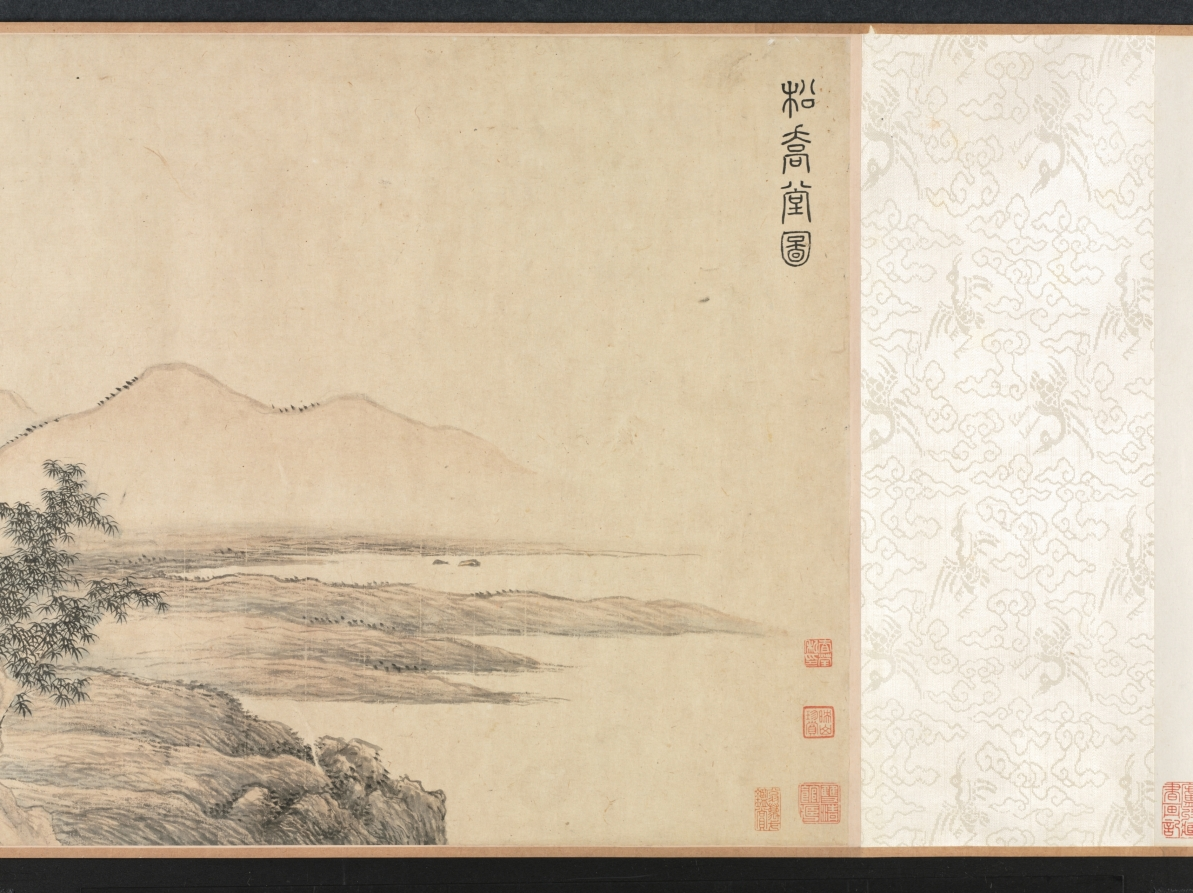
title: Hall of Lofty Pines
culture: China, Qing dynasty (1644-1911)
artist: Wang Hui (Chinese, 1632–1717)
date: 1703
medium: handscroll; ink and color on paper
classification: Painting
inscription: [題] 松喬堂圖 康熙癸未夏六月, 海虞耕煙散人王翬畫。[印]王翬之印; 石谷. [左下] 來青閣; 耕煙野老時年七十有二.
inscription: 松喬堂圖一卷，海虞石谷王君為靜海近公厲少司冦公作也。圖成于癸未之夏。未幾而公遂仙去。公令子今編修君南湖屬余題跋其後。余與公同官侍從，交契最深。側見公之清修純德，蔚為聖天子所眷重。侍直內廷，密勿贊襄，幾二十餘年。蒼生之所以受賜，士林之所以沐德者，天下莫能窺，在廷莫能悉。而公卒不言。以故宸衷日益契，恩禮亦日益渥。雖年逾懸車，時有歸老之念。而上固不聼公之去。其所謂松喬堂者，御書以賜公者也。蓋以松比公之清風勁節，而歲寒不改，經霜彌茂。則又以期公之壽考未有艾焉。公知此身未易乞，而山林槃磵之樂，止可寄諸寤思。此松喬堂圖之所由作也歟。石谷此圖，結構精密，筆墨超邁。其寫樹木之蒼蔚，堂宇之靚幽。恍見摩詰輞川樂天廬山之勝。獨惜公未得一日徜徉故園以償其願。即繪於圖亦未得以永其趣，此編修君之所以眷眷不忘也。雖然千歳之松喬，下蔭百畝，上以修棟梁之需。然則上當日名堂之意，不更望於後之人襲其芘而養其材也哉。吾願編修君之寶斯圖。并望君之塗塈丹雘，大其堂構也已矣。 康熈丙戍重陽三日，雲間王鴻緒跋。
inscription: 10 additional seals: 1 seal of Li Duna 勵杜納 (1628–1703); 4 seals of Zha Ying 查瑩 (jinshi of 1766); 5 seals of Li Yun (dates unknown).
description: Wang Hui 王翬, a leading painter in the orthodox school of the early Qing dynasty (1644–1911), was commissioned to paint this landscape with a country estate for Li Duna 勵杜納 (1628–1703), vice minister of justice in Emperor Kangxi’s court. The emperor had honored Li by granting him a piece of calligraphy with the name of Li’s retirement retreat, “Hall of Lofty Pines.” He drew a comparison between pines and Li’s upright character, resilience, and longevity. Wang Hui’s painting was supposed to allow Li to imagine living in a beautiful, secluded compound among the hills and pines. Sadly, Li died before seeing the completed painting and before receiving the emperor’s permission to retire. The landscape begins with peaceful riverbanks and low hills. The pines around the estate in the middle of the handscroll are truly lofty, some stretching even beyond the frame of the painting. Li Duna, the estate’s owner, is shown twice in his serene mountain retreat: first approaching the entrance to the compound with two servants at the right, and then later in the scroll, to the left, reading in the comfort of an inner room.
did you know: One servant carries the estate owner's carefully wrapped qin, a type of zither.